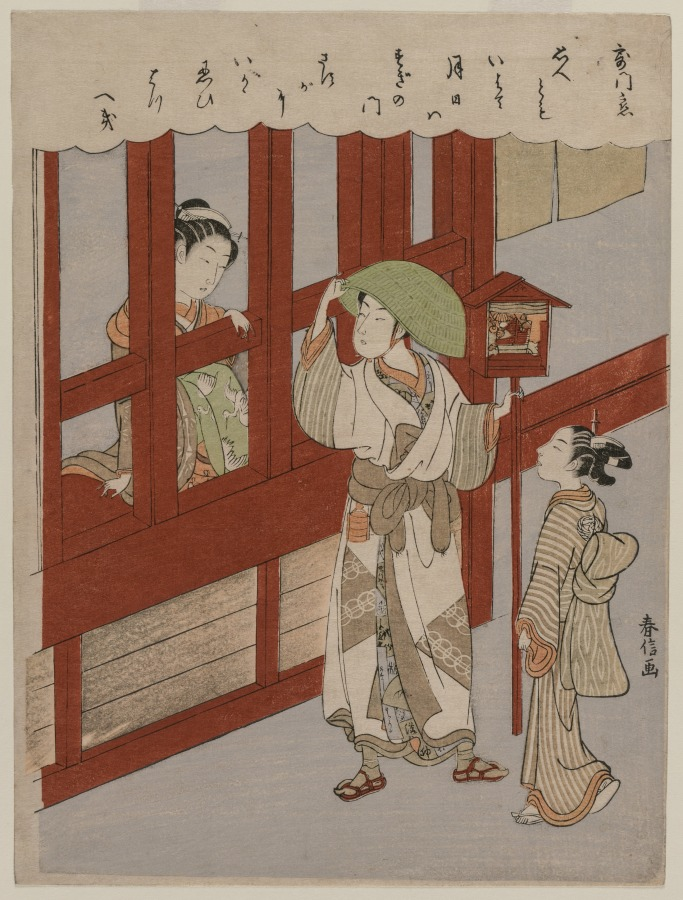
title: Love at the Brothel Gate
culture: Japan, Edo period (1615–1868)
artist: Suzuki Harunobu (Japanese, 1724–1770)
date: late 1760s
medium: color woodblock print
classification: Print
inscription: Siganture: Harunobu ga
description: Courtesans were on display to potential clients through bars, an aspect of their jobs that also afforded an opportunity to have socially distanced interactions with fellow entertainment district denizens. Here, a courtesan with a crane motif on her obi sash converses with her lover, a young man carrying a miniature theater. The poem in the cloud above them comes from New Collection of Poems Ancient and Modern (新古今和歌集) and reads, Although I yearn, I do not speak as days and months, pass by behind my cedar gate. How can I endure keeping this secret within?